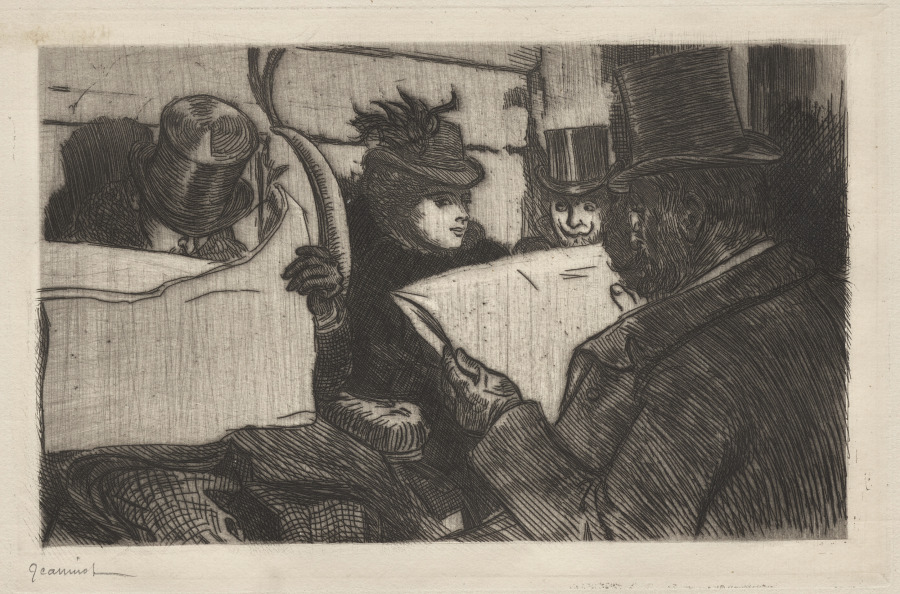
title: Evening Train (Le Train du Soir)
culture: France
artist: Pierre Georges Jeanniot (French, 1848–1934)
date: 1897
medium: etching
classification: Print